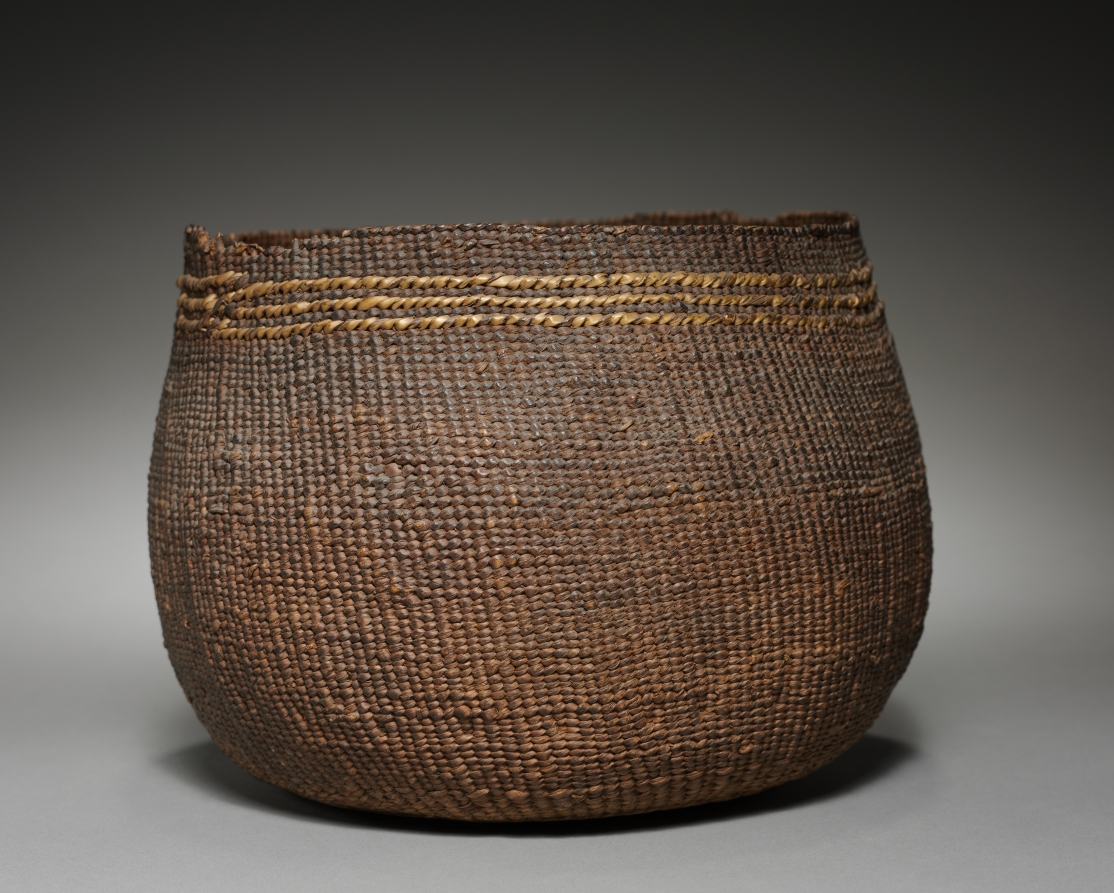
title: Cooking Bowl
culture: California (?), Native American, Unassigned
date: before 1927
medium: twined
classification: Basketry